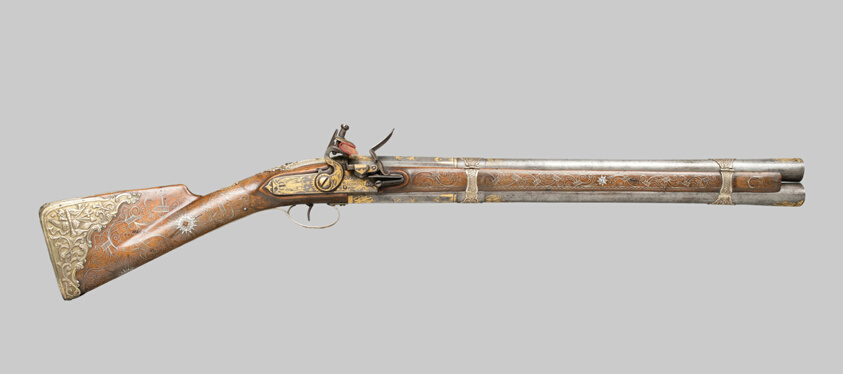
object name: Arms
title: Double-Barreled Flintlock Blunderbuss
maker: Russian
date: 1800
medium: Walnut, iron, gold, and silver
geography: Rossiya republic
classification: firearm-long gun; arms; arms and armor